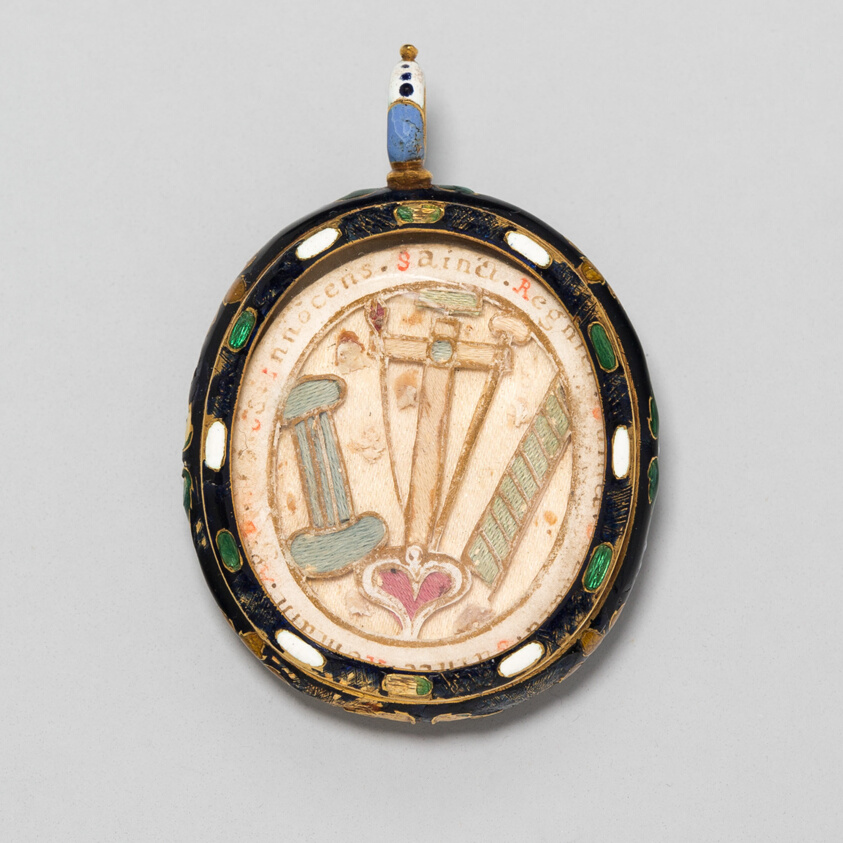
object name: Costume and Accessories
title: Double-Sided Pendant with Instruments of the Passion and Emblem of a Confraternity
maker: European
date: 18th century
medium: Gold, enamel, silk, and paperwork with gilding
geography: Europe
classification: pendant (jewelry); jewelry; european decorative arts; costume